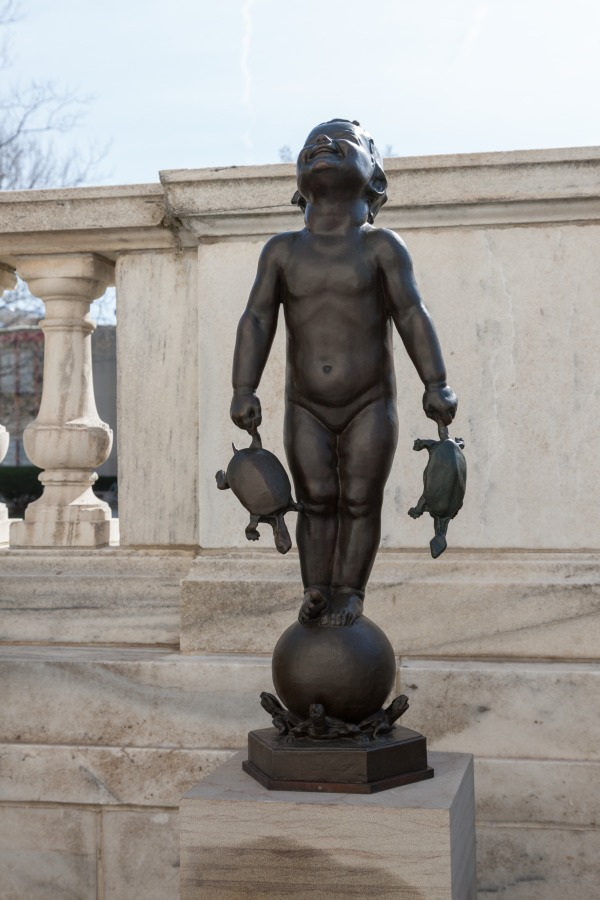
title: Turtle Baby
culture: America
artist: Edith Barretto Stevens Parsons (American, 1878–1956)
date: c. 1910–16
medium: bronze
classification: Sculpture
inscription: Signed on base: E. BARRETTO PARSONS COPYRIGHT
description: Parsons achieved renown through her garden sculptures of young children accompanied by animals, which one commentator praised for capturing “the happiness of just being alive.” In Turtle Baby, her most famous composition, the figure of the girl was modeled after her daughter. Conceived as a fountain, the sculpture has internal water conduits exiting the mouths of the four turtles circling its base.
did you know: Parsons created similar sculptures featuring young girls and boys with ducks, frogs, and fish.